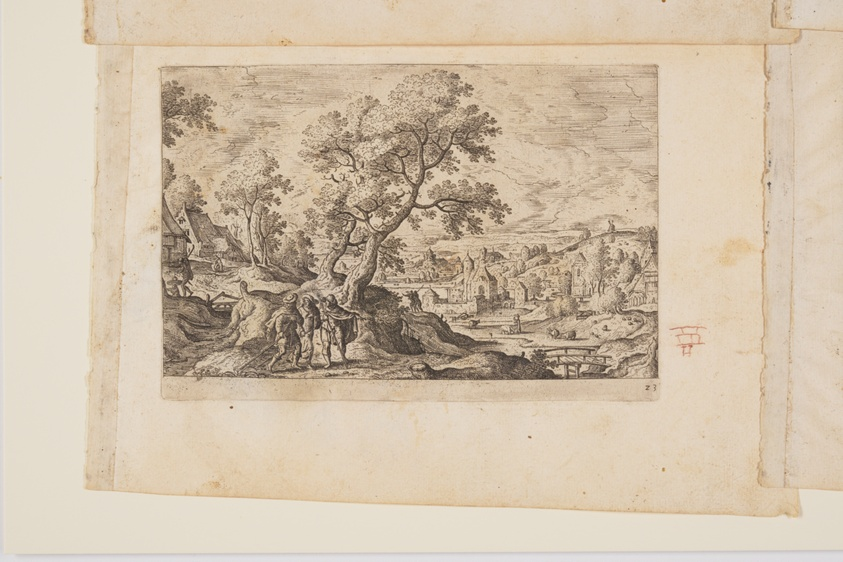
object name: Print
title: Plate 23, from Landscapes with Scenes from the Old and New Testament and Ovid’s Metamorphoses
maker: Hans Bol (Flemish, 1534–1593); published by Philip Galle (Flemish, 1537–1612)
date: 1574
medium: Etching on ivory laid paper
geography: Flanders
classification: print; paper; prints and drawing; etching